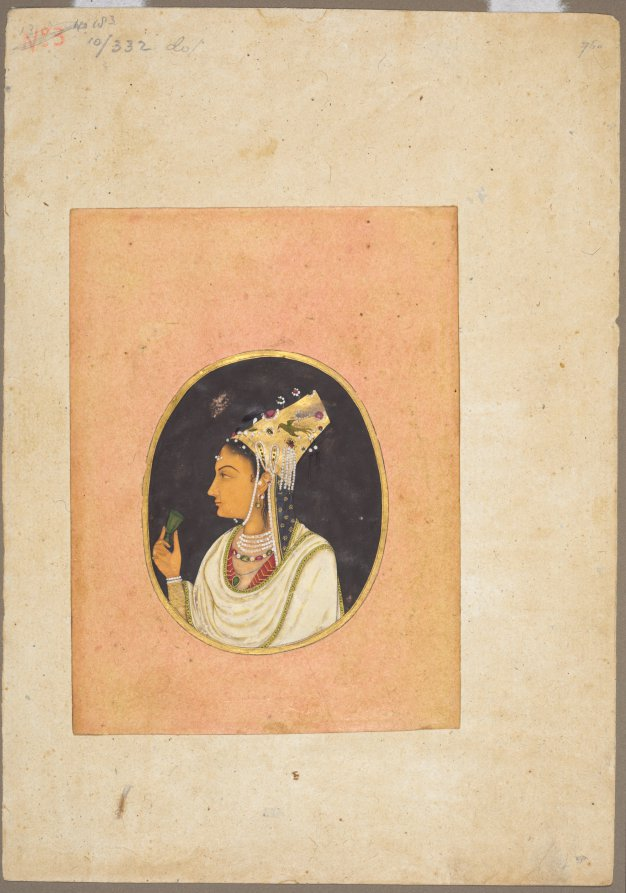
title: Oval portrait of a woman in a Chaghtai hat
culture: India, Mughal, 18th century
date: c. 1740–50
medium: Gum tempera and gold on paper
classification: Painting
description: The tall, flat-topped hat is an element of the native dress of the Mughals from eastern Uzbekistan. Of mixed Turkic and Mongol ethnicities, they spoke a Turkic language known as Chaghatai. Chaghatai refers to the name of the son of the Mongol Chingiz (Genghis) Khan, who ruled this area of Central Asia from 1246 to 1282. This woman’s hat has been studded with jewels and strings of pearls. The portrait jewel format that was once reserved for the emperor has now been expanded to include ladies of the court. The woman holds a jade wine cup and wears a draped upper garment with a woven or embroidered border similar to the fragment on display at the left.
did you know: She holds a delicate jade cup of the type for which the Mughals were famous.